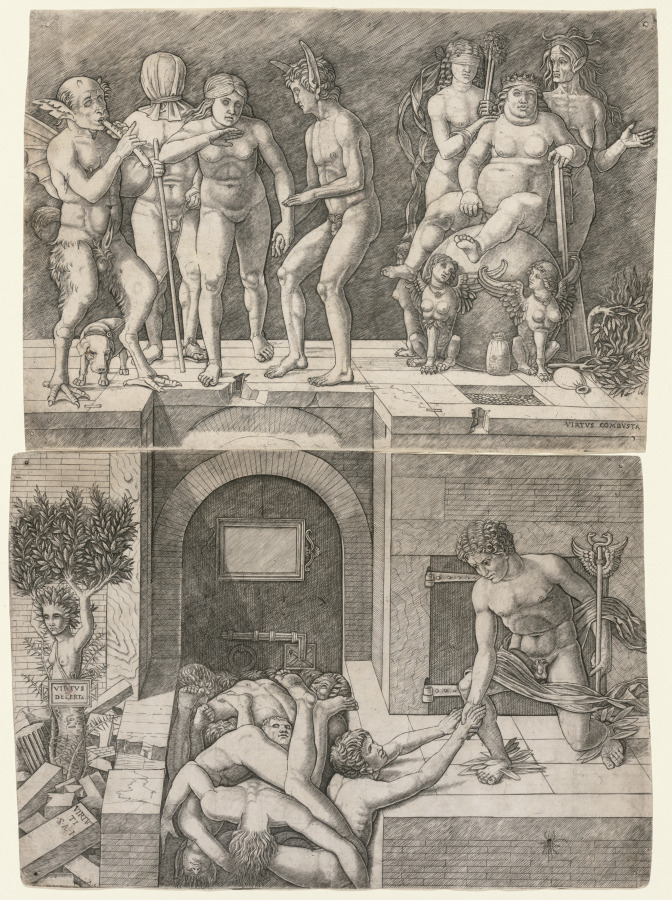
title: Allegory of the Fall of Ignorant Humanity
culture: Italy, late 15th-early 16th century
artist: Giovanni Antonio da Brescia (Italian)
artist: after Andrea Mantegna (Italian, about 1431–1506)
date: c. 1500–1505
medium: engraving printed on two sheets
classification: Print